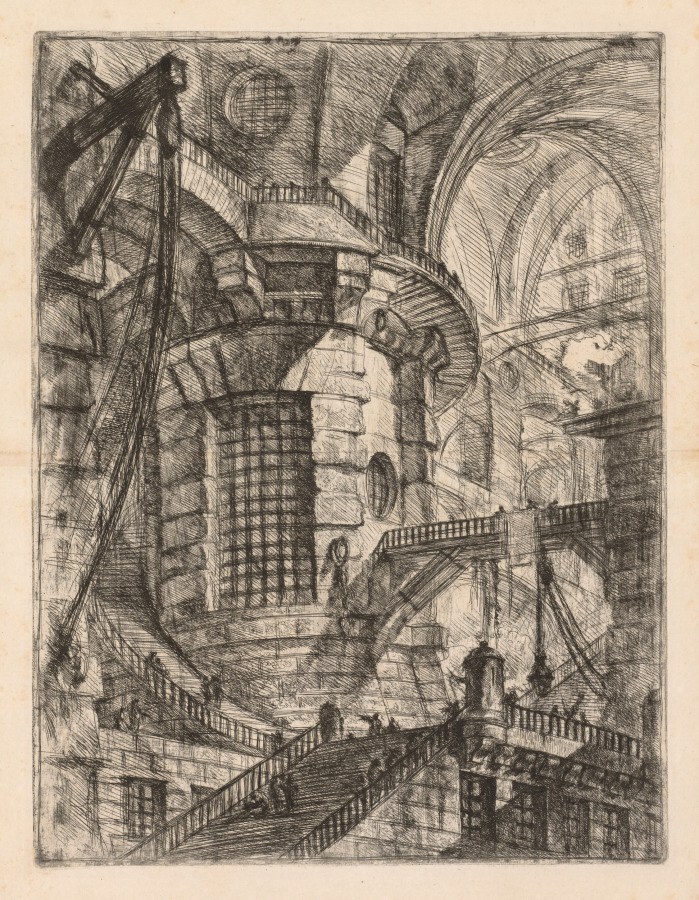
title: The Prisons: A Vaulted Building with a Central Column with Barred Window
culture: Italy, 18th century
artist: Giovanni Battista Piranesi (Italian, 1720–1778)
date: 1745–1750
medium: etching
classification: Print